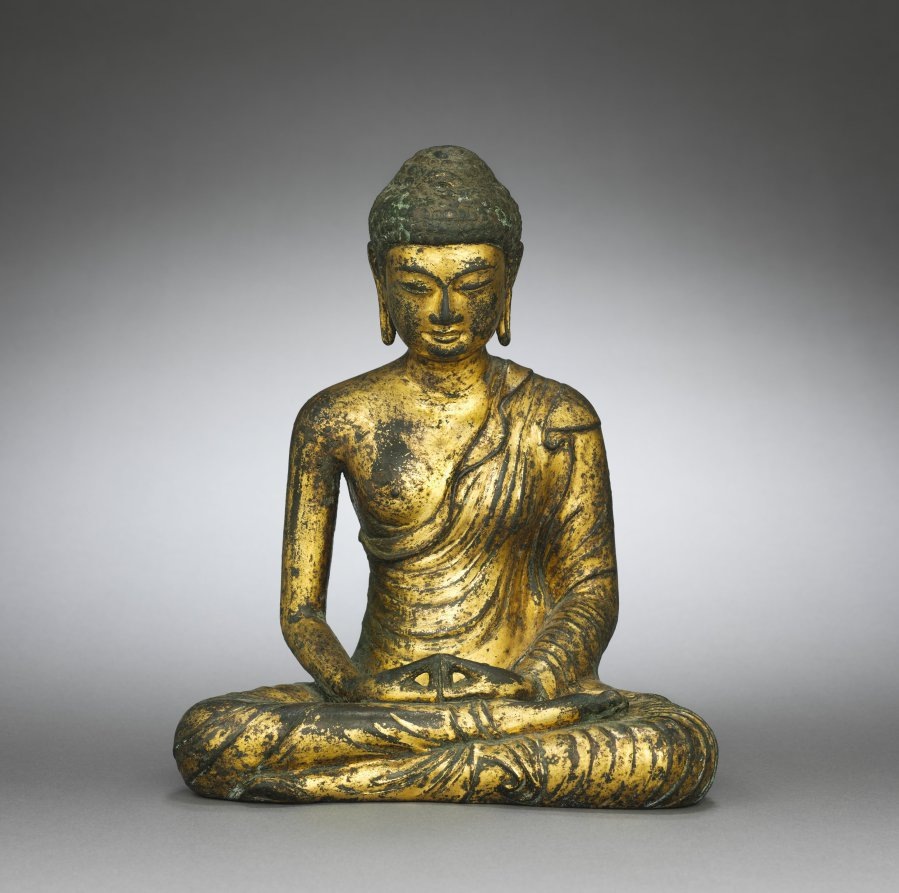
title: Amitabha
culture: China, Yunnan province, Dali kingdom (938–1253)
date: mid-1000s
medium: gilt bronze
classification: Sculpture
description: This delicately crafted statue of Amitabha, the Buddha of Infinite Light, bears testimony to the flowering of Buddhist art under the Liao Empire established by the Khitans, a nomadic Mongolian people, after the Tang persecution of Buddhists in 845. The Liao rulers were devout Buddhists who commissioned substantial religious projects. Liao Buddhist artifacts reflecting close ties to the Tang traditions were likely executed by displaced or enslaved artisans as a result of the Khitan conquest of northern China.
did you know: This gilt bronze Buddha is similar in style to another rare piece in the Shanghai Museum, which bears an inscription dating it to 1043, the second year of the Shengming reign of the Dali kingdom.